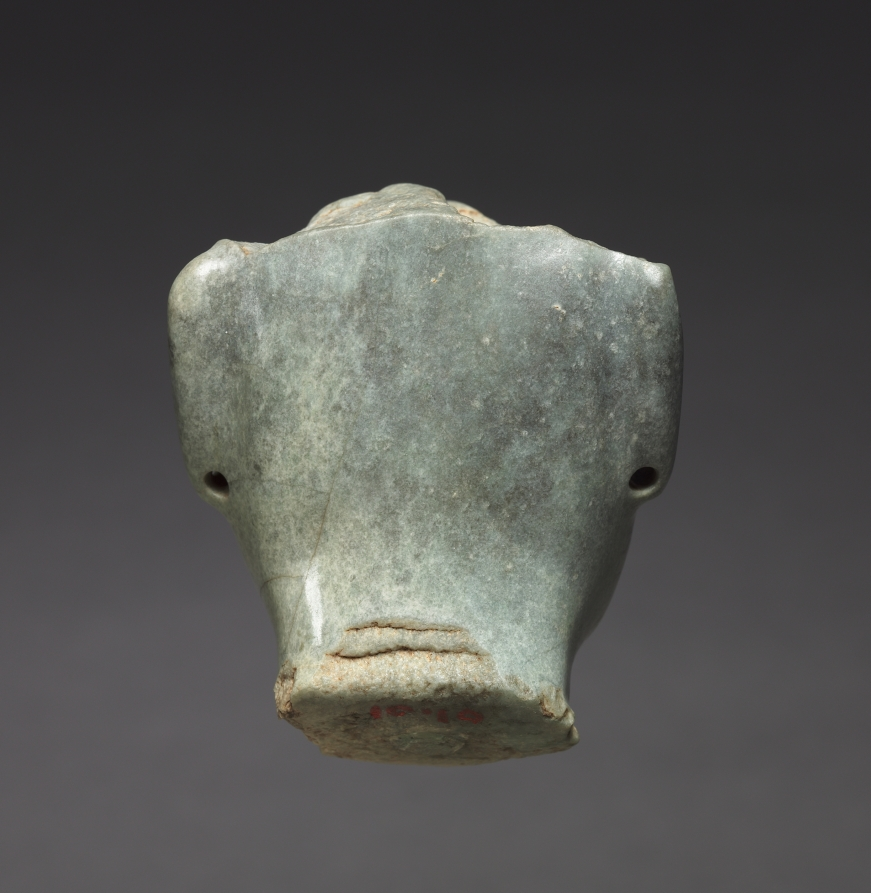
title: Head Fragment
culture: Mesoamerica, Mexico, Olmec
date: c. 900–300 BCE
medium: jadeite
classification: Jade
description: This sensual head fragment may come from a seated or standing figure like those shown nearby, though much larger. The carving is exceptionally fine, from the slight under-eye puffiness to the delineation of the fleshy lips and the teeth. The profile face of supernatural being is incised just in front of each ear, perhaps indicating that the subject had special power.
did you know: In ancient Mesoamerica, jade was more valuable than gold.